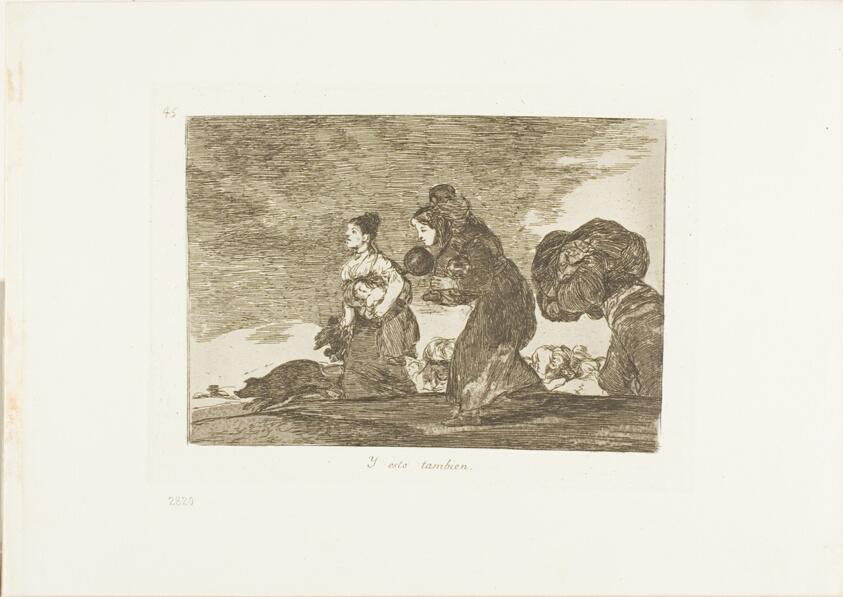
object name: Print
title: And this too, plate 45 from The Disasters of War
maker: Francisco José de Goya y Lucientes (Spanish, 1746-1828)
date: 1812/15, published 1863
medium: Etching, aquatint or lavis, drypoint and burin on ivory wove paper with gilt edges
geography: Spain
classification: etching; print; prints and drawing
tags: war